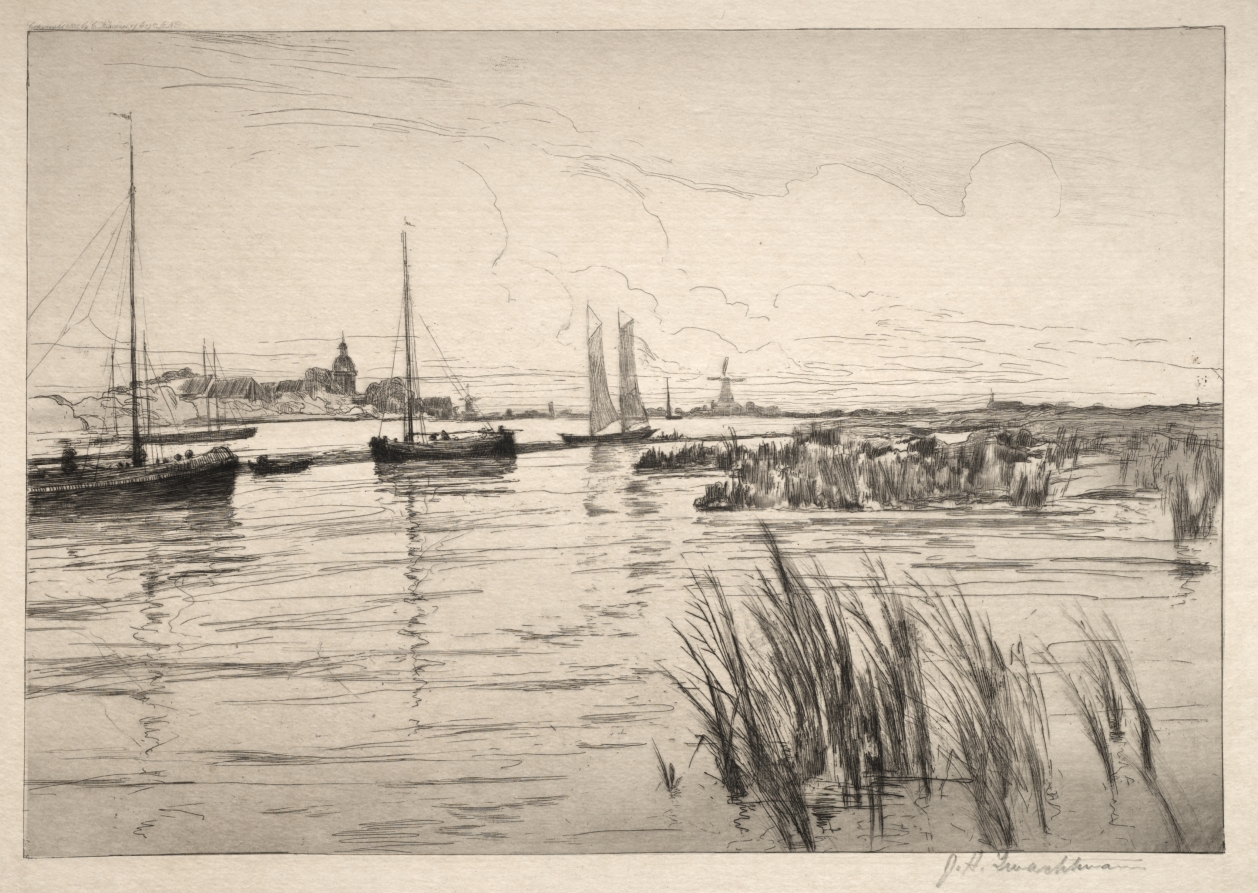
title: Holland Dykes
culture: America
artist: John Henry Twachtman (American, 1853–1902)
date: c. 1885–88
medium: etching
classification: Print